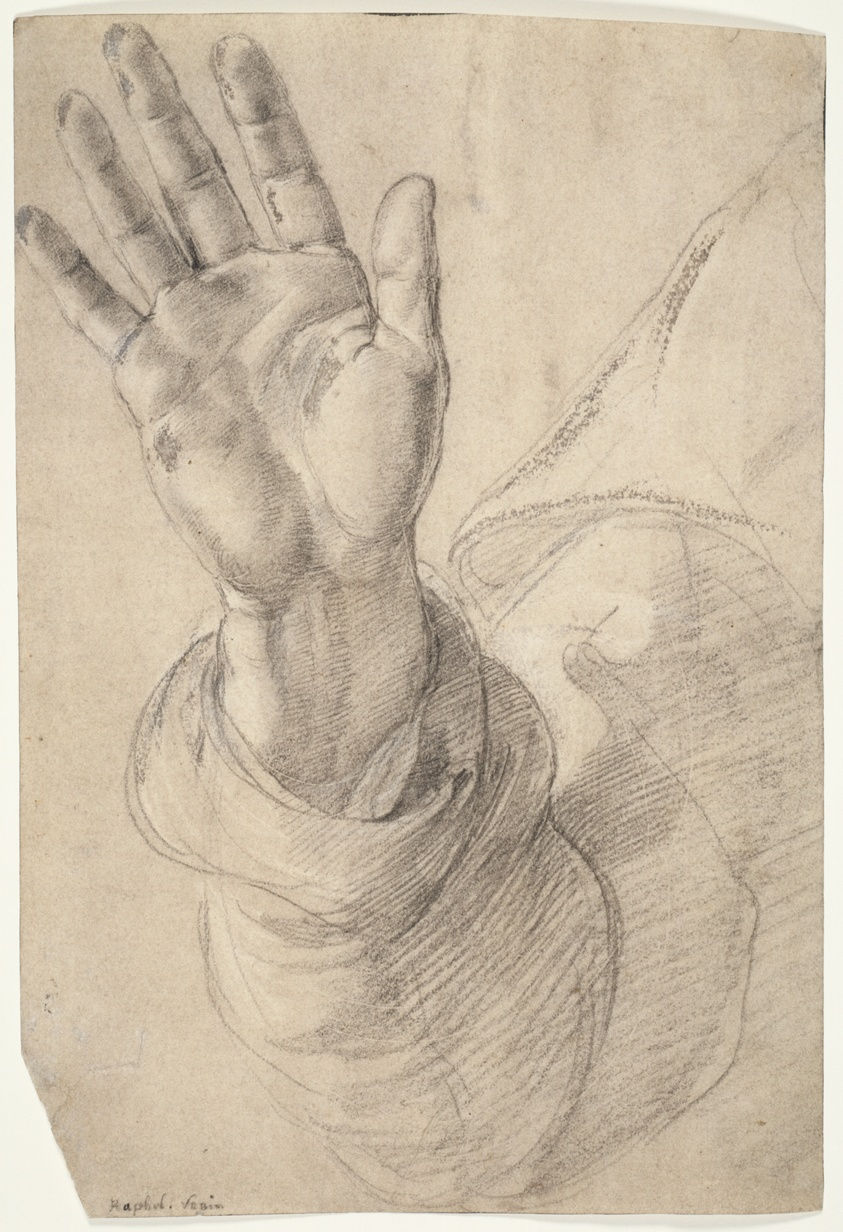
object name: Drawing and Watercolor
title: Upraised Right Hand, with Palm Facing Outward: Study for Saint Peter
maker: Raffaello Sanzio, called Raphael; Italian, 1483-1520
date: 1518/20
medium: Black chalk, heightened with white chalk and lead white, partially oxidized, over stylus underdrawing, on cream laid paper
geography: Italy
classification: chalk; drawings (visual works); prints and drawing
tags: study